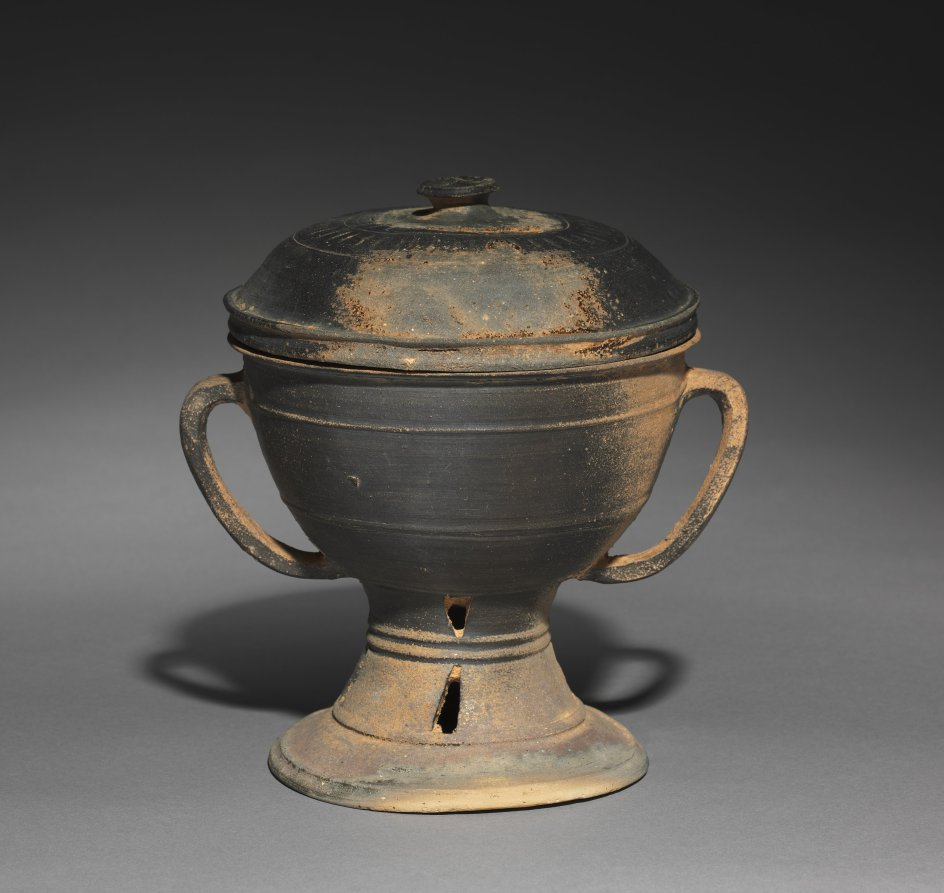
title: Lidded Cup with Strap Handles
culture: Korea, Gaya period (42–562 CE)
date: 300s–400s CE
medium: stoneware with natural ash glaze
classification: Ceramic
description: Pottery vessels with a footed stand such as this one is the earliest known high-fired ware. Its gray color is the result of the reduction of oxygen in the closed kiln chamber. Footed vessels were not for everyday usage, but rather served to present offerings to the deceased.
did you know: A series of triangular cutouts shown on the bottom are standard features of Kaya pottery.